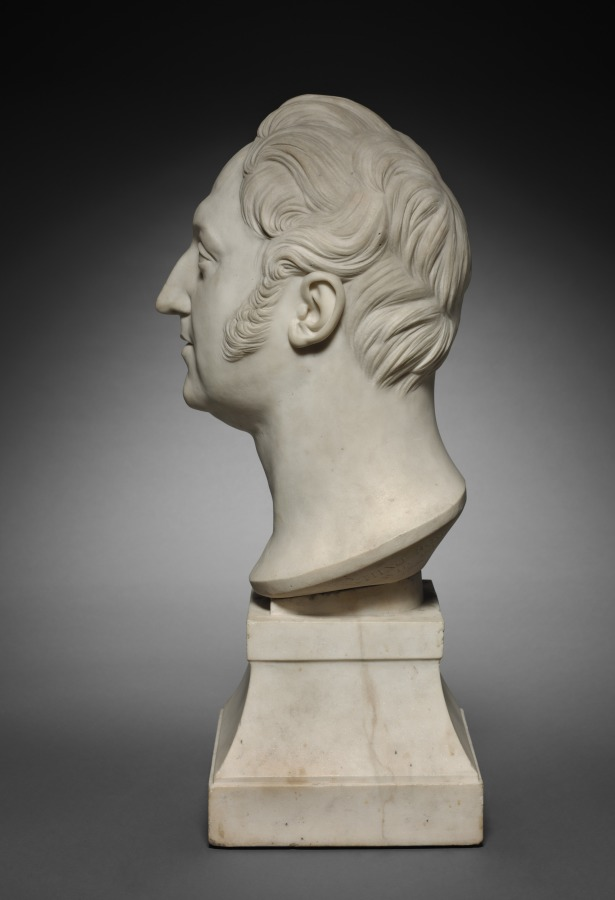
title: Bust of Rossini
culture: France, 19th century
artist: Pierre Jean David d'Angers (French, 1788–1856)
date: 1831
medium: marble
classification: Sculpture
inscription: inscribed at back of neck: A / Joachino Rossini de Pesaro / P.J. David d'Angers / 1831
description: Gioacchino Antonio Rossini (1792–1868) was a composer most famous for his comic operas. Although of Italian birth, much of Rossini's later life was spent in Paris, where he undoubtedly sat for this portrait for David d'Angers, whose ambition it was to sculpt portraits of all the famous people of his day.